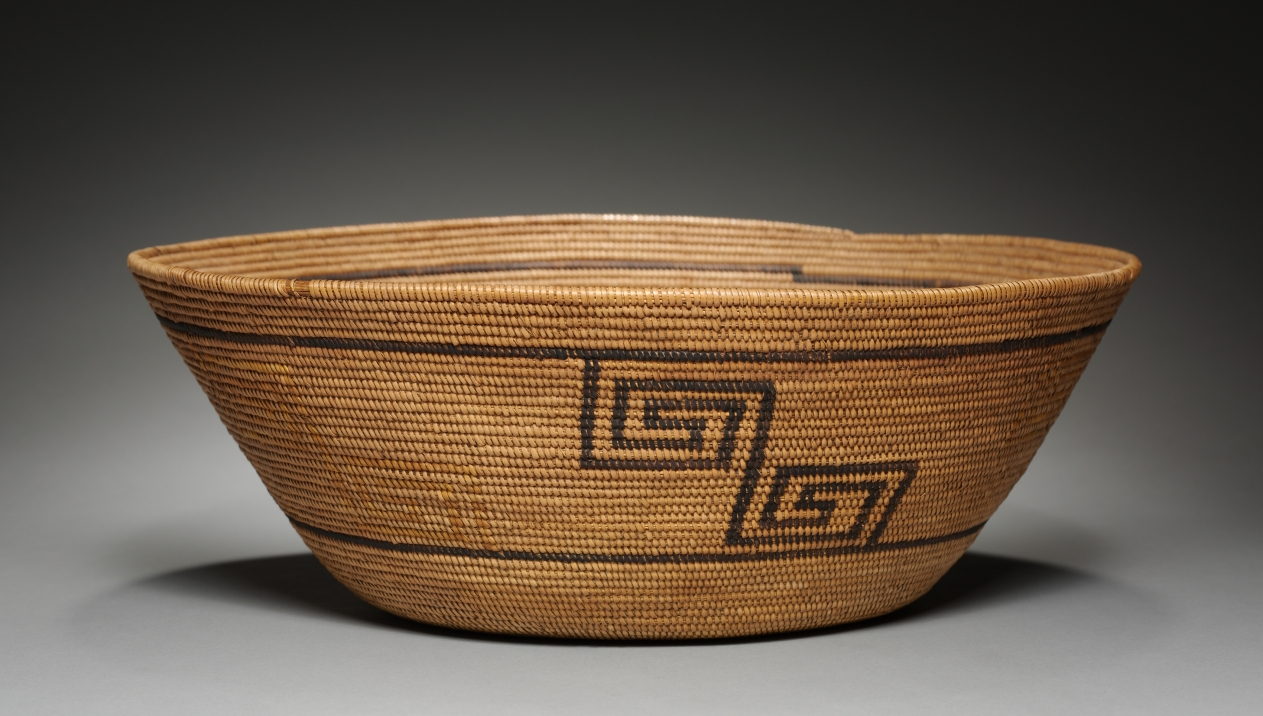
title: Food Bowl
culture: California, Mission, Late 19th- Early 20th century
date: c 1875– 1924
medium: coiled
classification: Basketry